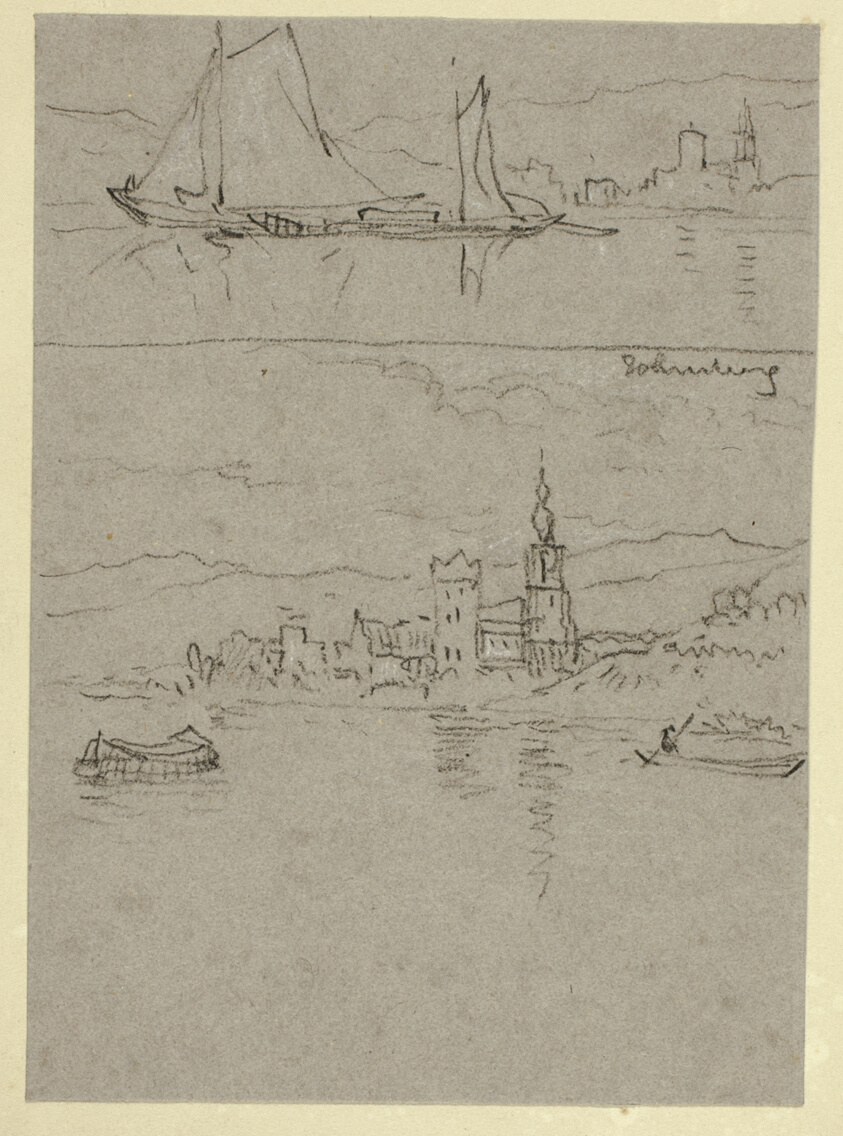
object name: Drawing and Watercolor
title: Two River Scenes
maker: William Alfred Delamotte (English, 1775-1863)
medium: Black chalk, highlighted with white chalk, on gray wove paper, tipped onto cream wove paper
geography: England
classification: chalk; drawings (visual works); prints and drawing